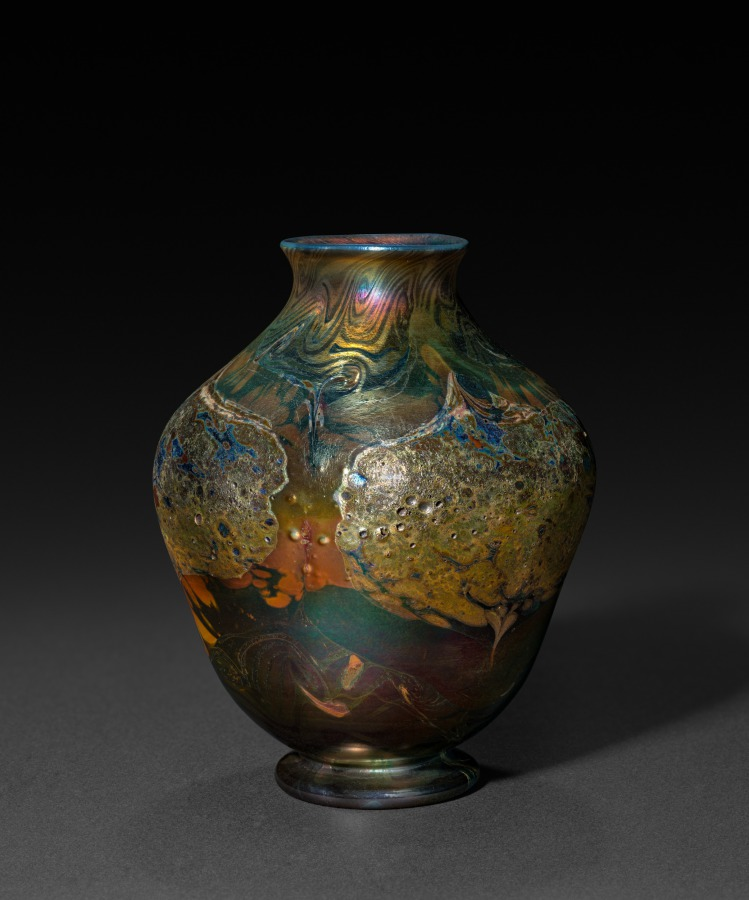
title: Cypriot Vase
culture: America, New York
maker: Tiffany Glass & Decorating Company (America, New York, 1892–1902)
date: c. 1895–1900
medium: Favrile glass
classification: Glass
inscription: engraved on underside: L.C.T. 5339 #206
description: This small vase is an example of Louis Comfort Tiffany's signature Favrile glass. It was made in the style of ancient glass from Cyprus that Tiffany had admired for the iridescent color and encrusted texture of the surface caused by oxidation while buried for many years. Tiffany had noticed these qualities in ancient glass exhibited at the Metropolitan Museum of Art and at his father's store, Tiffany & Co., in New York. When Tiffany began collaborating with artisans on new types of glass production in the 1880s, his aesthetic ambitions were realized in the development of Favrile glass, deliberately named to sound French, expensive, and “handmade.” Largely through Tiffany's marketing ability, Favrile glass became America’s greatest contribution to the Art Nouveau style. His works were exhibited at international expositions; galleries in major European cities, where his creations were bought by many museums; and in his store in Manhattan, known as the Tiffany Glass and Decorating Co., later Tiffany Studios. From the outset, Tiffany used Favrile glass in mosaic panels, stained glass windows, and his artistic line of table and floor lamps.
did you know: Louis Comfort Tiffany took inspiration from the ancient glass artifacts found in the collection of the Metropolitan Museum of Art in New York.